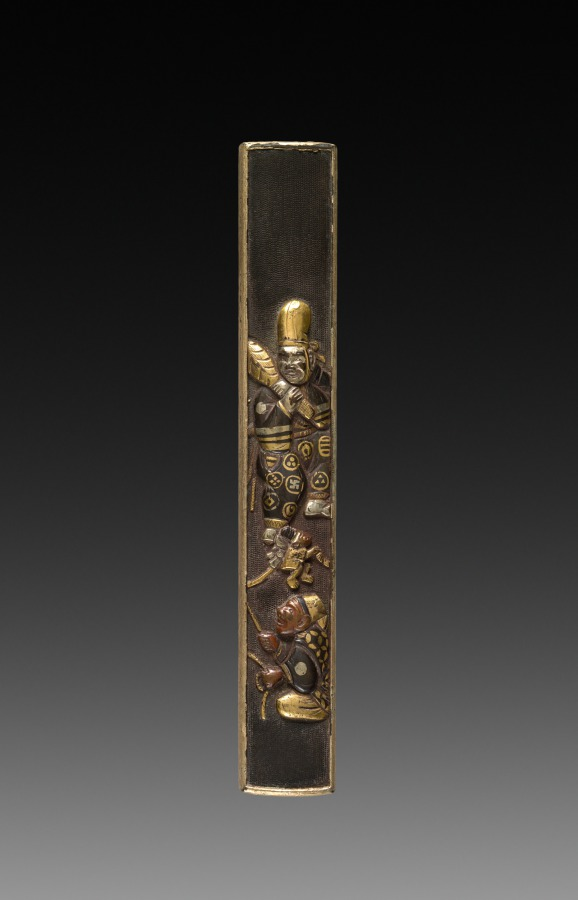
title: Knife Handle (Kozuka)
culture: Japan, Edo period (1615–1868)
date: early to mid-1800s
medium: inlaid bronze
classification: Metalwork